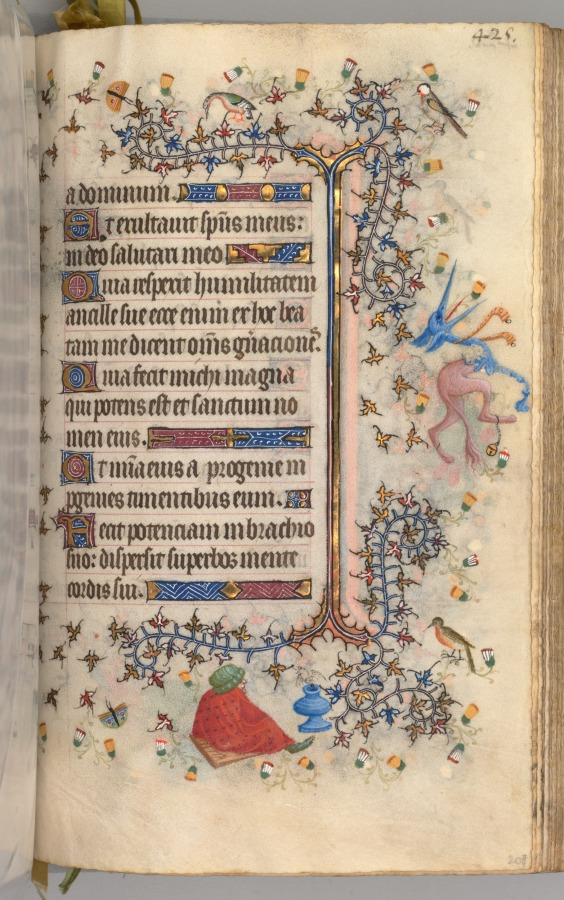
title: Hours of Charles the Noble, King of Navarre (1361-1425): fol. 207r, Text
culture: France, Paris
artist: Master of the Brussels Initials and Associates (French)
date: c. 1405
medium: ink, tempera, and gold on vellum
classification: Bound Volume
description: This precious volume was obviously highly prized by its owner, the French-born King of Navarre, who had his coat of arms painted on no less than twenty folios. Rather than directly commissioning this manuscript from a specific workshop, it seems that Charles the Noble acquired his book of hours -- perhaps ready-made for the luxury market -- while on a trip to Paris in 1404-05. A collaborative effort, six painting styles are evidenced within the pages of this codex, those of two Italians, two Frenchmen, and two Netherlanders. The painter who was responsible for the planning and decoration of the book, and who produced seventeen of the large miniatures, was a Bolognese artist known as the Master of the Brussels Initials. His principal assistant, responsible for most of the borders, was a Florentine who signed his name "Zecho" da Firenze on folio 208 verso.